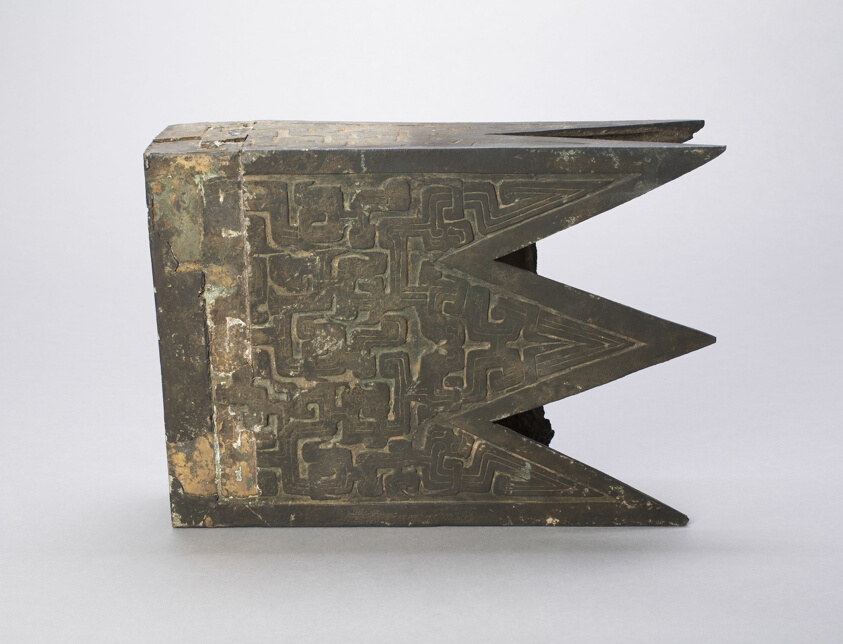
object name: Architectural fragment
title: Architectural Fitting (Gong)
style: Chinese (culture or style)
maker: China, Qishan county; Shaanxi province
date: Eastern Zhou dynasty, Spring and Autumn period (770–481 B.C.), 7th century B.C.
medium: Bronze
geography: China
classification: architectural fragment